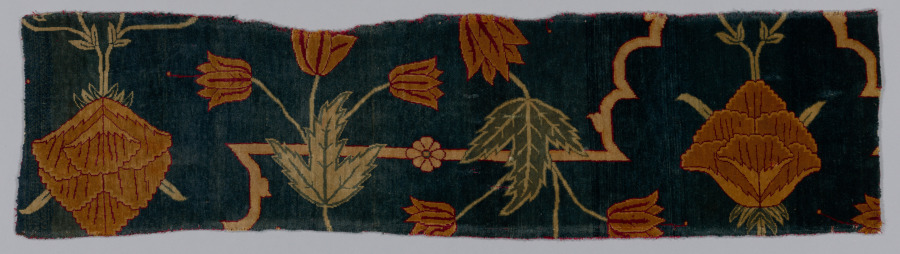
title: Fragments of a Carpet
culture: India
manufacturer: Imperial Manufactory (Indian)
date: 1600–1650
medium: silk and wool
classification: Carpet